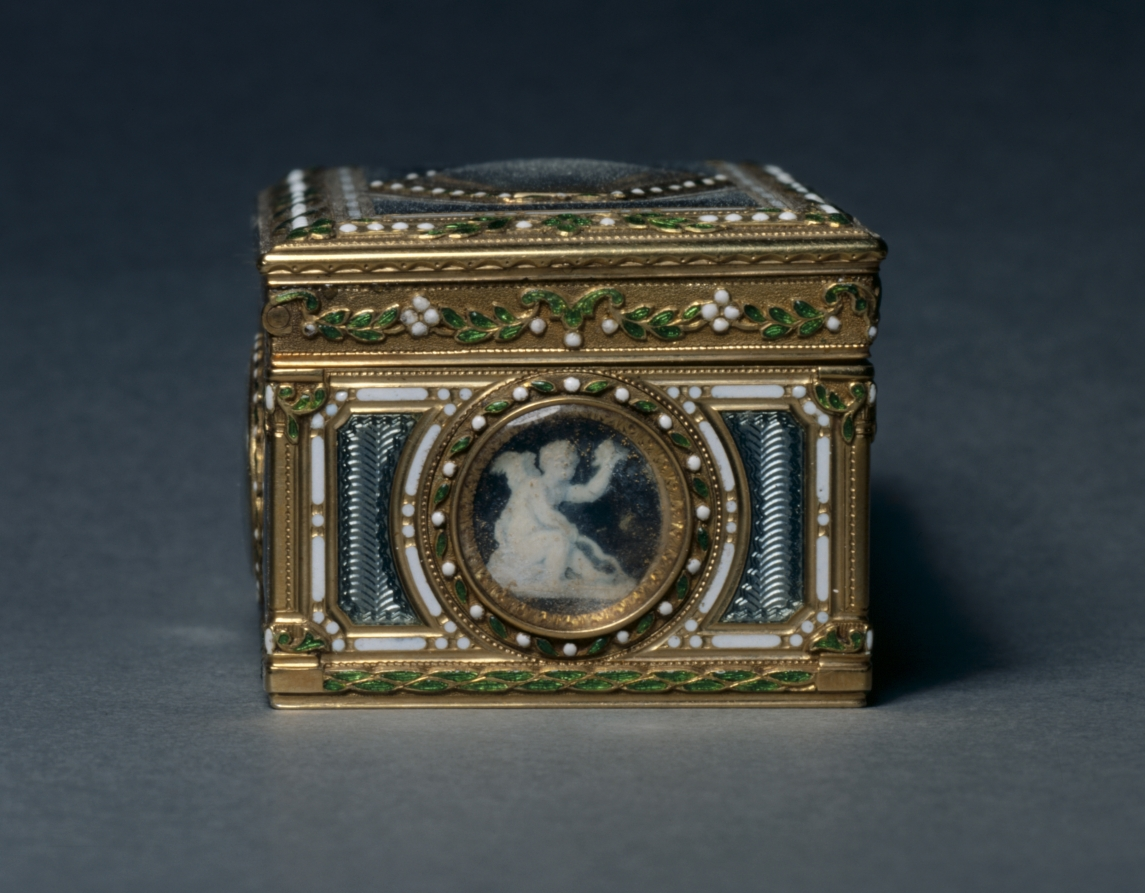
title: Snuff Box (Tabatière)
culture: France, 18th century (style of Louis XVI)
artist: François Chazeray (French)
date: 1777–78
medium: gold and enamel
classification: Metalwork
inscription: [Maker's mark of François Chazeray, master goldsmith in 1760, cover; bottom; front wall]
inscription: [Warden's mark (probably a crowned "O"), Paris, 1777-1778, cover; bottom; front wall]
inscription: [Illegible mark, bottom]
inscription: [Illegible mark, cover]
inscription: [Illegible charge mark, inside front]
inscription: [Discharge mark of Jean-Baptiste Fouache, Paris, 1774-1780, on neck at left.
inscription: [Outside of neck, modern inscription '4 (modern inscription]:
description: This box is decorated with figures of antiquity associated with love: winged cupids, dancing nymphs, and representations of the Greek goddess of love. These scenes are inspired by antique cameos, intricately carved gemstones crafted in ancient Greece and Rome. This interest in ancient iconography, symmetry, and classical compositions of gods and goddesses was characteristic of 18th-century neoclassicism.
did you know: Decorated with allegorical scenes of love, it is likely that this box was a present between lovers.